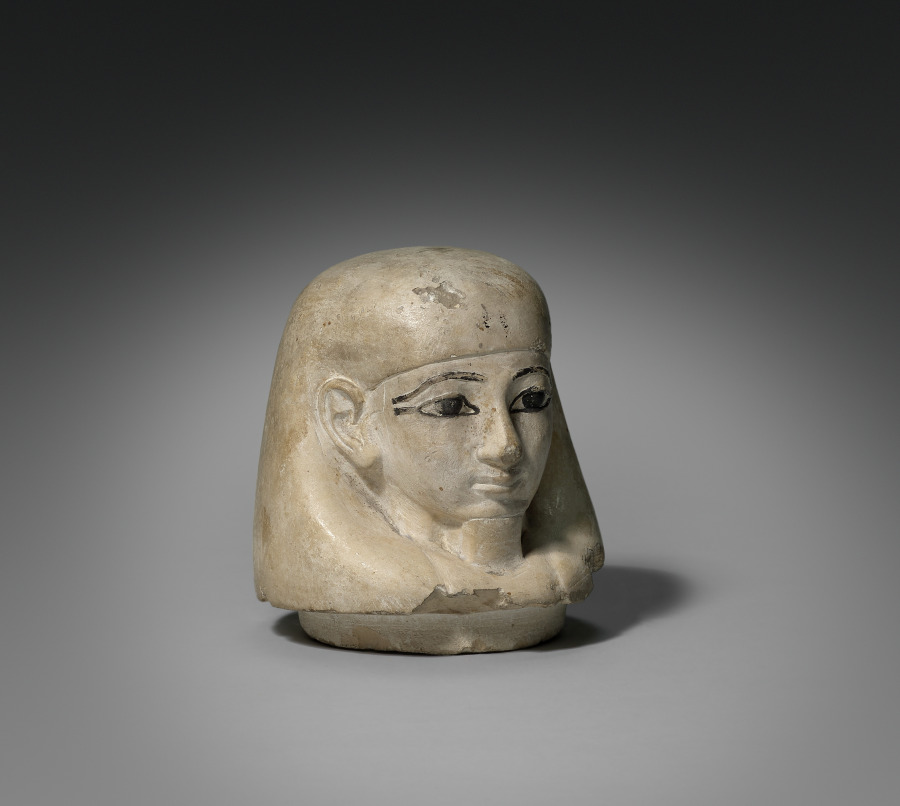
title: Canopic Jar with Lid (lid)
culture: Egypt, New Kingdom (1540–1069 BCE), Dynasty 18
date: 1540–1296 BCE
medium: limestone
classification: Funerary Equipment